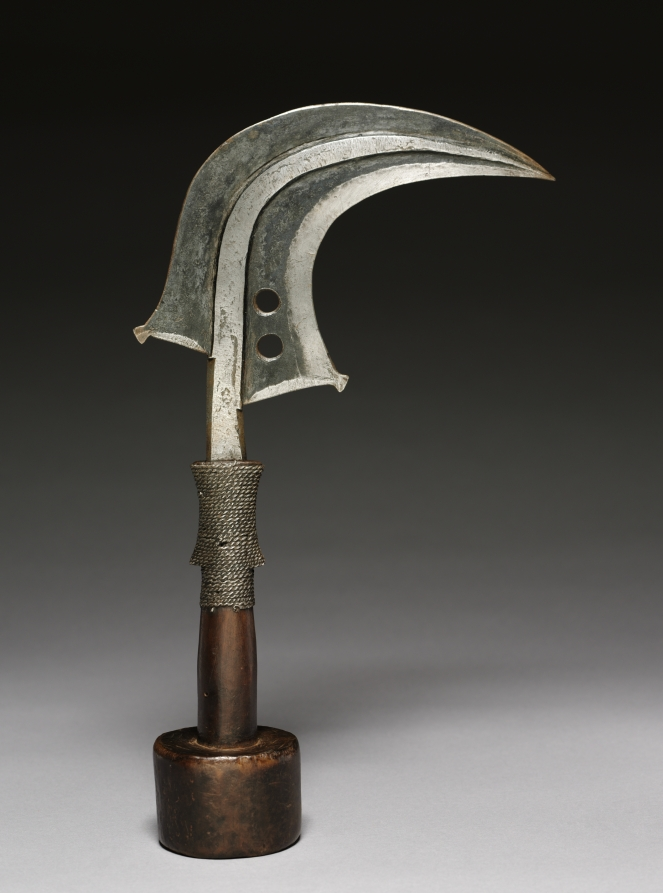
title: Throwing Knife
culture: Central Africa, Democratic Republic of the Congo, Oriental Province, Mangbetu, 19th century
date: 1800s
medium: Iron and wood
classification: Arms and Armor